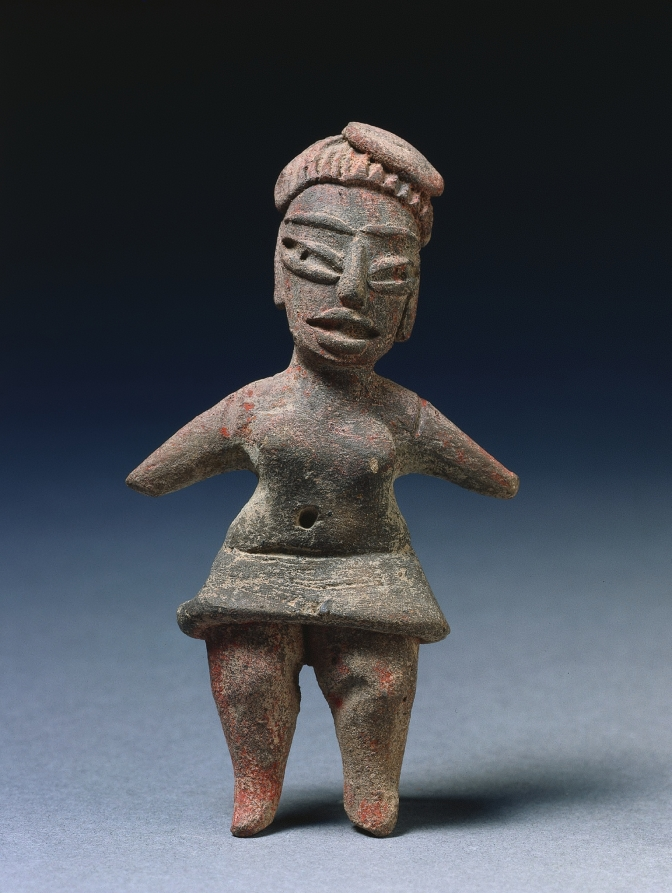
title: Archaic Figurine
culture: Mesoamerica, Central Mexico, Tlatilco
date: c. 1200–900 BCE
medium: earthenware with pigment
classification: Ceramic